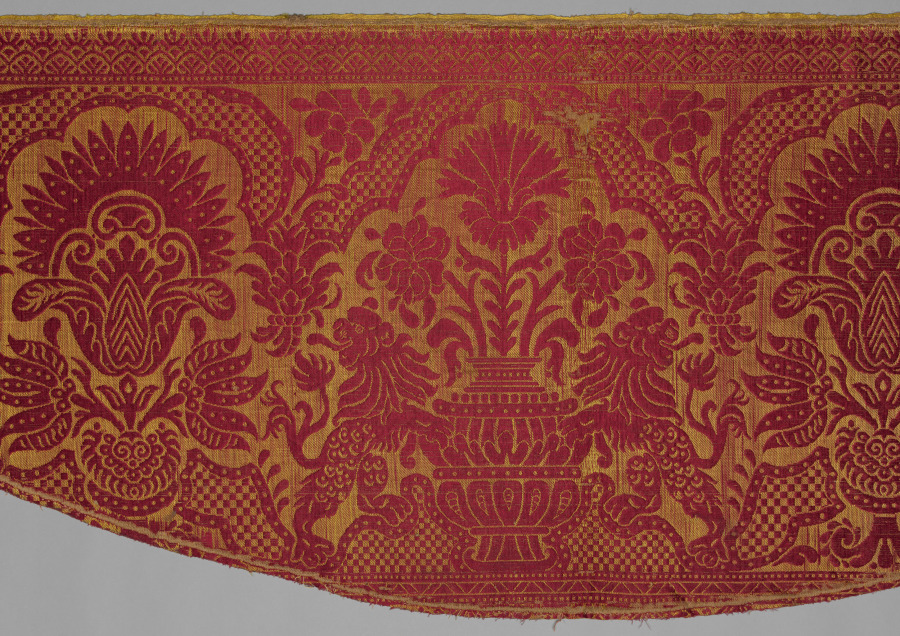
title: Silk and Hemp Fragment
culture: Spain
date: 1500s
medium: plain compound satin: silk and hemp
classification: Textile